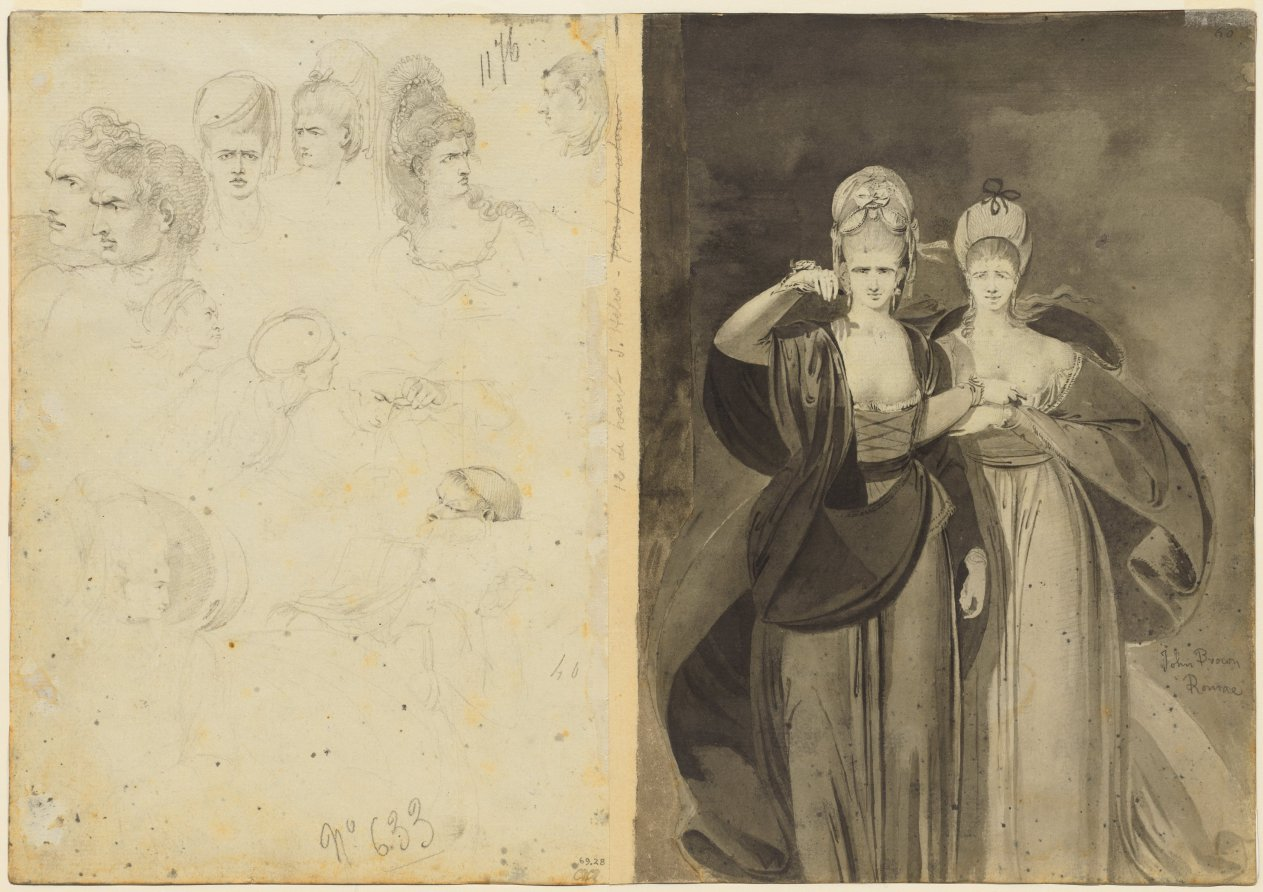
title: Sketches of Heads (verso, left); Two Women (verso, right)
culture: England, 18th century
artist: John Brown (British, 1752–1787)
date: c. 1770–75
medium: left: graphite; right: gray and black wash with point of brush and graphite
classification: Drawing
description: John Brown is known for a small group of monochromatic drawings imbued with sinister overtones. At the age of 20, the Scottish artist traveled to Italy where he spent the next 12 years. This drawing exemplifies his Roman street scenes which often depict women dressed in spectacular, billowing costumes. Here, a figure with bare ankles and plunging décolletage is surrounded by a crowd of men who leer at her. The reverse of the sketchbook sheet includes two independent drawings: a study of faces in fierce and intense expressions, and a pair of women wearing swirling gowns. One figure raises her hand in a mysterious gesture, either beckoning or forewarning the viewer.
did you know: John Brown meant for the dark background of this drawing to evoke the potential danger of Italian nights; the writer Johann Joachim Winckelmann had been murdered in Trieste in 1768, in the most conspicuous example of the period's widespread violence.